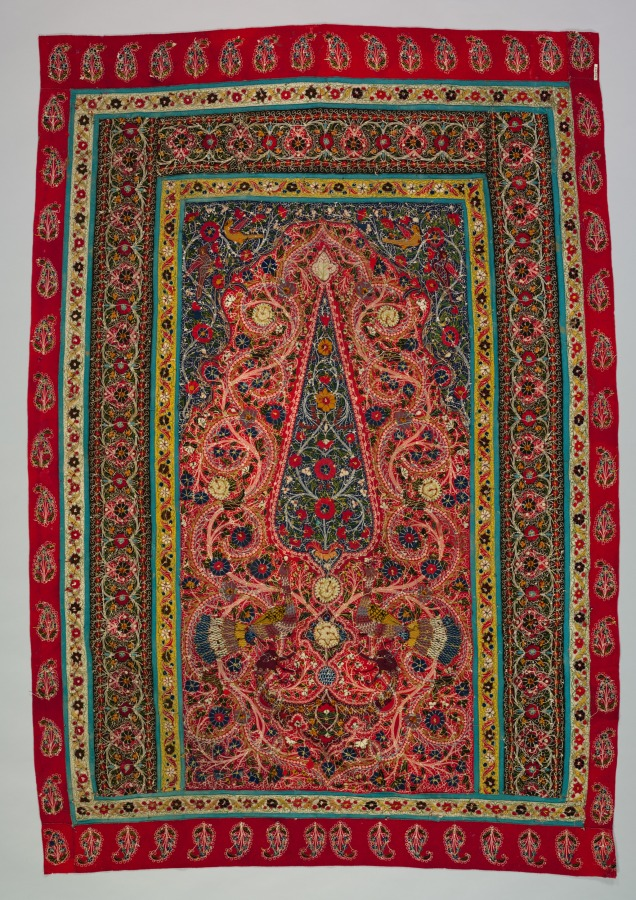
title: Tent Wall Panel(?)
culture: Iran, Rasht, Qajar period (1779-1925)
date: 1800s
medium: Wool: inlaid work; silk: embroidery, chain stitch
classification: Embroidery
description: Elaborate arched panels with multiple borders similar to this textile formed the mosaic-like interior walls of imperial tents. Here, the field is dominated by a richly decorated cypress tree above peacocks and dragon heads on an ornate foliate ground. We look upon the gardenscape through a niche (mihrab) formed by this foliage. Bright white silk “pearl” outlines, vines, and ringlets in chain-stitch embroidery enliven the pattern on contrasting colors of fulled wool. Internationally fashionable botehs, or paisleys, decorate the outer red borders.This technique has been referred to by many different names including: Rasht work, Resht work, Rashti-duzi, Rachti-douzi, embroidery applique, mosaic embroidery, piecework, patchwork, embroidery brocade, and inlaid patchwork. Many of these terms are to various degrees inaccurate descriptions of this technique. Perhaps the most practical term is Rasht work, named for the town in Iran where the technique was popularized. It begins as a ground of felted plain weave wool. Desired shapes are then punched out of the ground with a metal die and hammer. The same is done with wool of an alternating color. The edges of the different cut pieces are then embroidered together into various designs using a silk chain stitch (golab-duzi). Although this piecework technique was recorded in Iran in the 1670s, most examples survive from the 19th century, when foreigners praised them as “really [the] most beautiful embroidery.” The technique appears in furnishing fabrics, and horse covers, as well as imperial portraits, including one depicting the Qajar monarch Fath ‘Ali Shah, who ruled in 1797–1837. Sometime after leaving the workshop this panel experienced moth damage; small patches can be seen throughout.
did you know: Generally, Rasht work was made by men. Boys handled the delicate embroidering while older men designed cartoons and punched the wool designs.